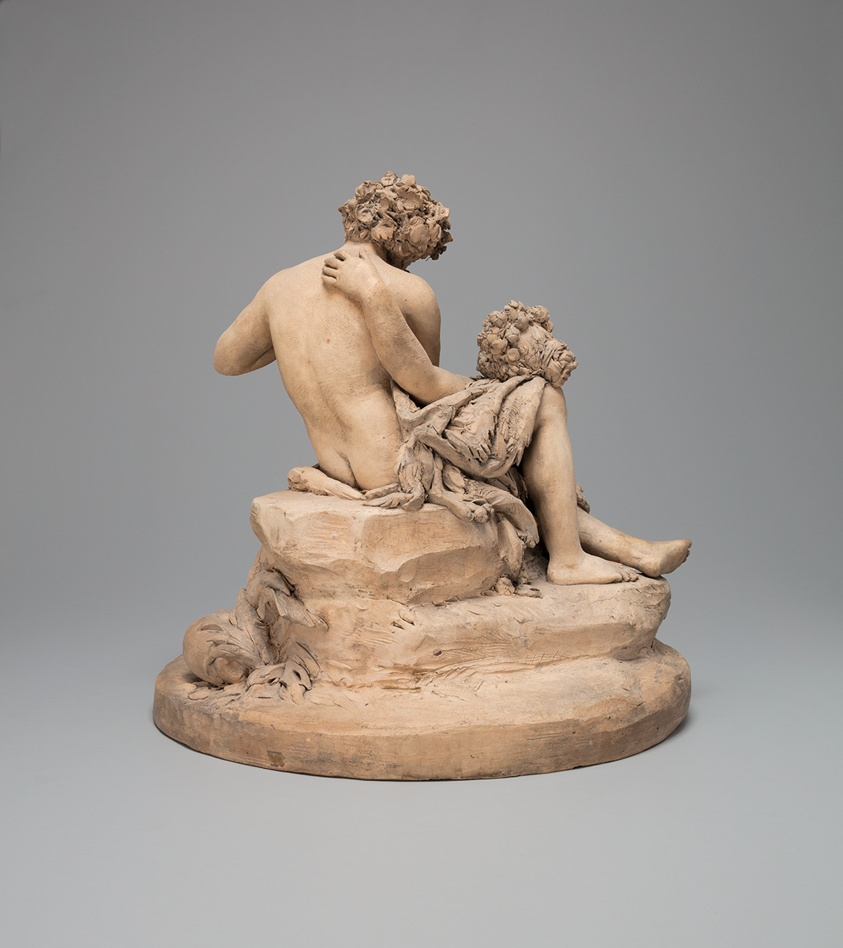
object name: Sculpture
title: Shepherd and Shepherdess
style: 18th Century, 19th century, nineteenth century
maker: Attributed to Joseph Charles Marin (French, 1759–1834)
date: 1790/1800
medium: Terracotta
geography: France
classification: statuette; sculpture; french; terracotta (sculpture)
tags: shepherds, couples, foliage, food, grapes, instruments, leaf, leaves, man, musical instruments, nudes, rocks, textile, woman